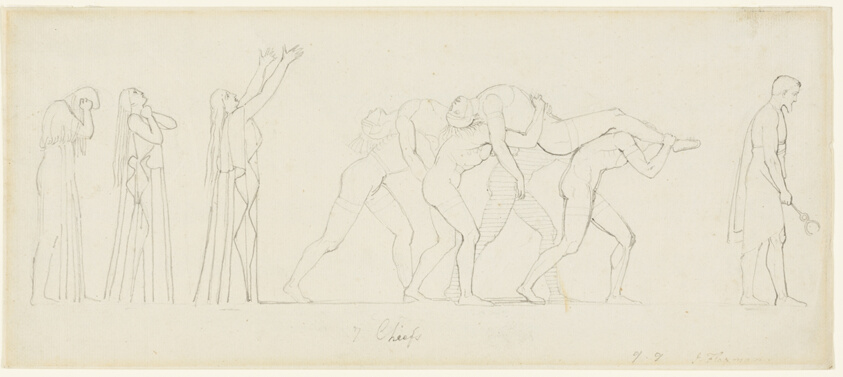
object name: Drawing and Watercolor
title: Seven Chiefs Against Thebes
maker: John Flaxman, II; English, 1755-1826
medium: Pen and gray ink, over graphite, on gray laid paper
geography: England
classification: pen and ink drawings; drawings (visual works); prints and drawing